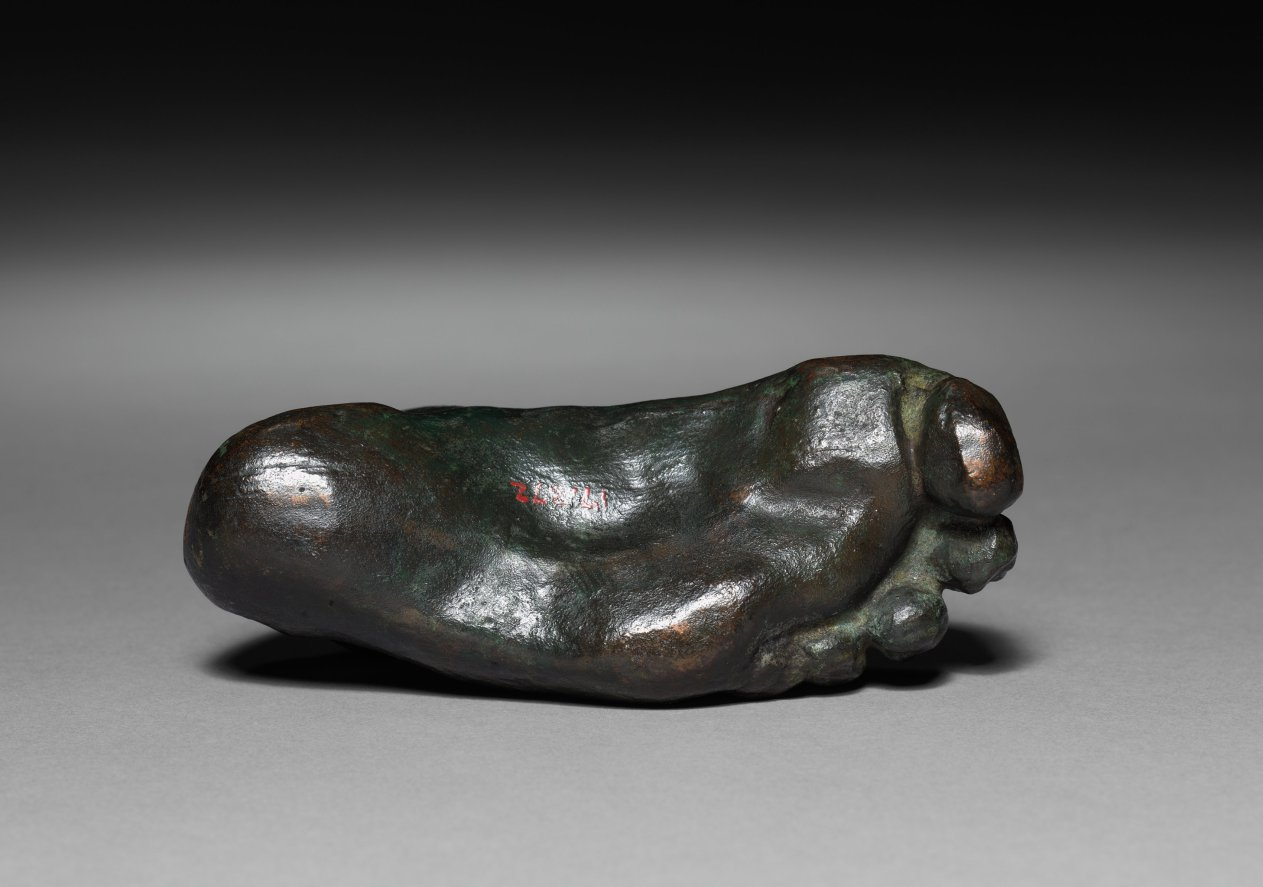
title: Model of a Foot (left foot)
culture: France, late 19th-early 20th Century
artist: Auguste Rodin (French, 1840–1917)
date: c. 1880 – 1917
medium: bronze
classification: Sculpture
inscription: Signed: "A. Rodin"